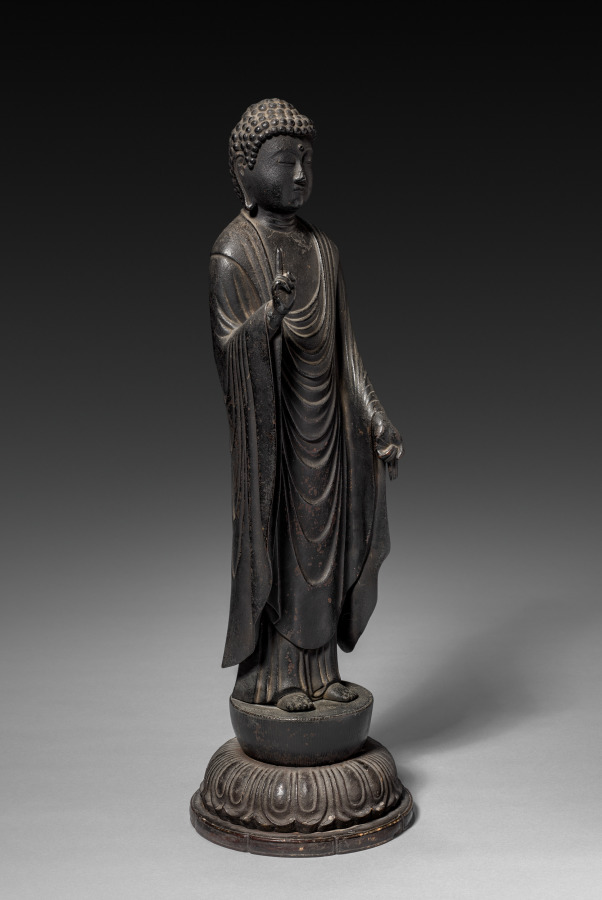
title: Amida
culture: Japan, Kamakura period (1185–1333) to Nanbokuchō period (1336–92)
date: 1300s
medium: patinated bronze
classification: Sculpture